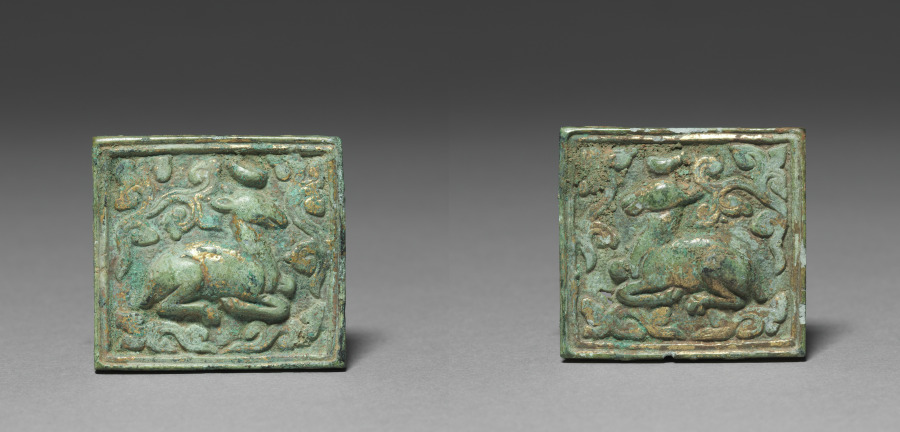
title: Belt Ornament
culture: Korea, Goryeo dynasty (918–1392)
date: 918–1392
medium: gilt bronze with repoussé relief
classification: Metalwork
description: Metallurgy advanced remarkably in the Goryeo period (918-1392), explaining why a large quantity of sophisticated metal artifacts with delicate designs were used not only as daily accessories but also as burial goods. Belt ornaments like this example were fixed to leather belts. Surround by intricate arabesque patterns, a seated dear was done in the repoussé technique. Such animal motifs were widely shared among Eastern Eurasian tribes, from where the first settlers in the Korean peninsula originated.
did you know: The Japanese antique dealer Yamanaka & Company, which opened its branches in New York (1895) and Boston (1899), sold small Korean archaeological materials such as this belt ornament to American collectors in the early 20th century.